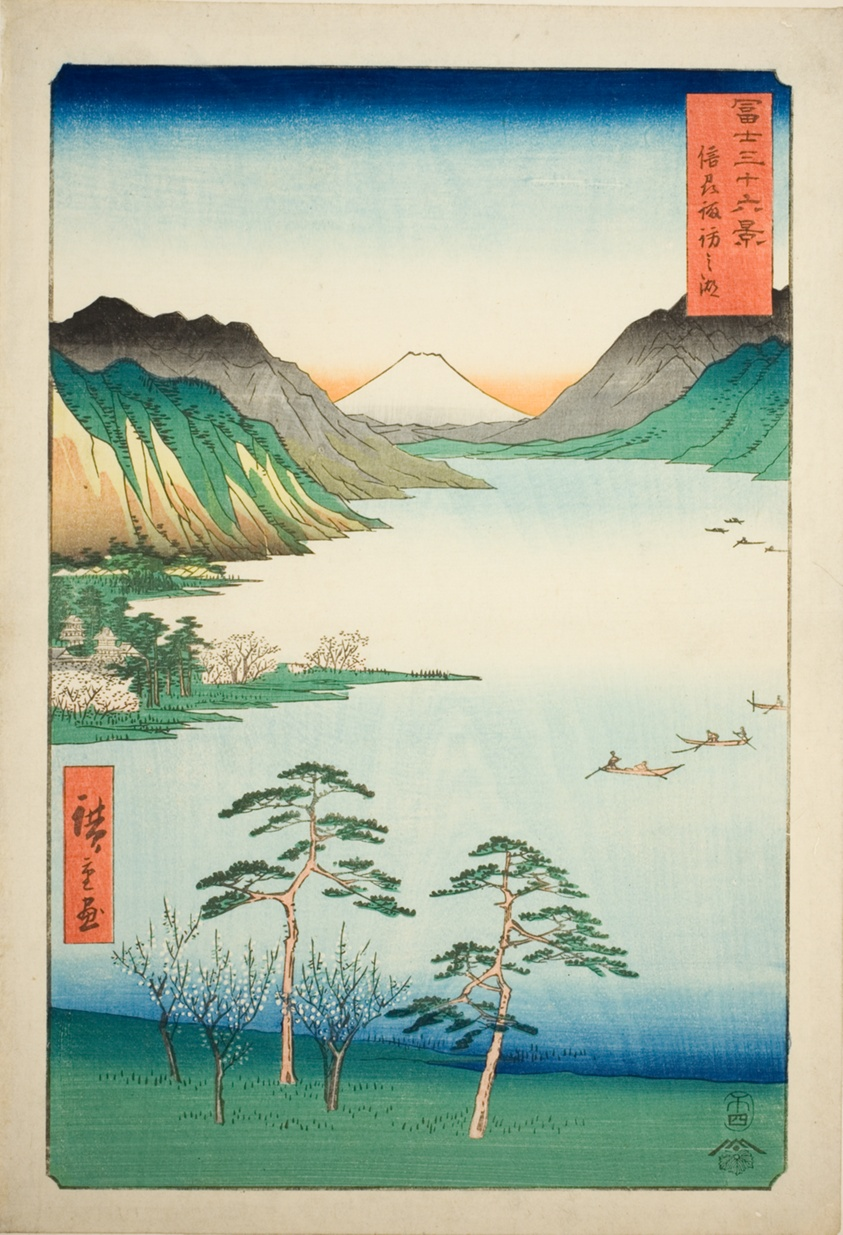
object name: Print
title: Lake Suwa in Shinano Province (Shinshu Suwa no mizuumi), from the series "Thirty-six Views of Mount Fuji (Fuji sanjurokkei)"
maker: Utagawa Hiroshige 歌川 広重; Japanese, 1797-1858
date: 1858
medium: Color woodblock print; oban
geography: Japan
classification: woodblock print; print; asian art